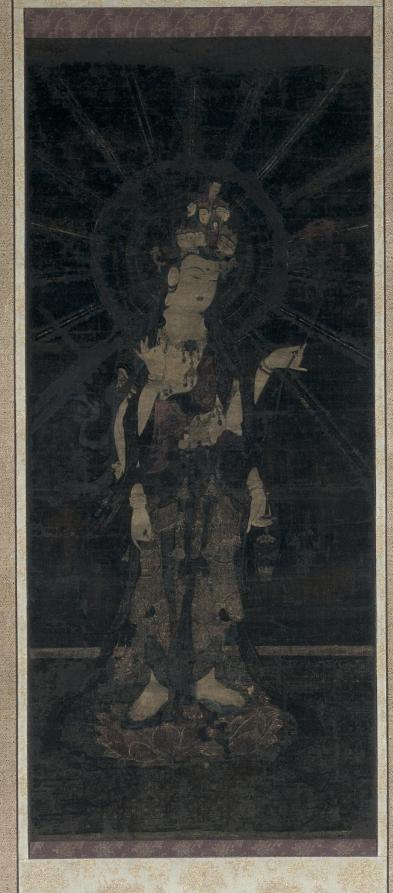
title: Eleven-Headed Kannon (Jūichimen Kannon)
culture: Japan, Kamakura period (1185–1333)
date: 1200s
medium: hanging scroll; color and cut gold (kirikane) on silk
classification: Painting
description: The Eleven-Headed Kannon, a deity of mercy and compassion in the Buddhist pantheon, was introduced into Japan in the 600s. By the 700s it had gained in popularity among an increasing number of believers, a condition it enjoyed until the end of the Kamakura period. The modest size and high quality of the materials apparent in this work indicate its use as a private devotional image. An earlier restoration of this painting included the use of an entire silk backing layer rather than silk patches with a paper backing. The tension that resulted between these two layers of silk, one old and the other recent, caused serious cracking to occur in the painting's surface. Moreover, the silk backing had been dyed a dark tone which did not enhance the appearance of the painting, although it did help hide damaged areas in the surface silk. Now two layers of backing paper support the painting, with its carefully fitted silk patches. These are toned slightly differently from the original surface values so that viewers can distinguish between the original and the modern restored areas. The original metal fittings have also been cleaned and reused. Other replacement fittings were deemed inappropriate for this early religious image and so new, specially designed ones are now in place.